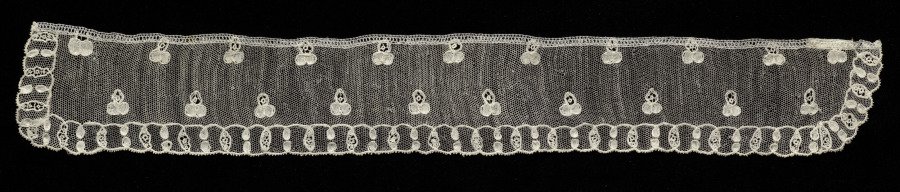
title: Lace Collar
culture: Italy, Burano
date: 1760–99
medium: Linen: needle lace (Burano Point)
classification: Lace